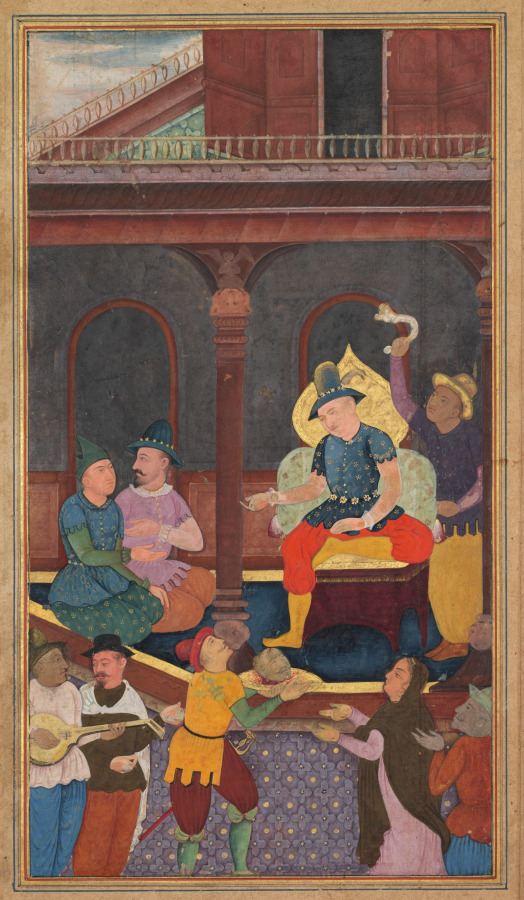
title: Salome Receiving John the Baptist’s Head on a Platter (folio 112 verso), from a Mirror of Holiness (Mir’at al-quds) of Father Jerome Xavier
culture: Mughal India, Allahabad, made for Prince Salim (1569–1627)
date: 1602–4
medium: Gum tempera, ink, color, and gold on paper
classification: Manuscript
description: Herod, King of Judea, sits on a Mughal-style throne as his wife’s daughter Salome reaches for the freshly severed head of John the Baptist. John had offended Herod’s wife, so she took revenge by having her daughter seduce Herod into granting her this wish. Salome is depicted modestly in this painting, and the court musician at the lower left looks on in disgust. The lion head capitals on the pillars above Herod are upside down, seemingly in disapproval of the debauched king.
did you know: Column capitals in Herod’s palace have angels seated on upside-down lion heads.